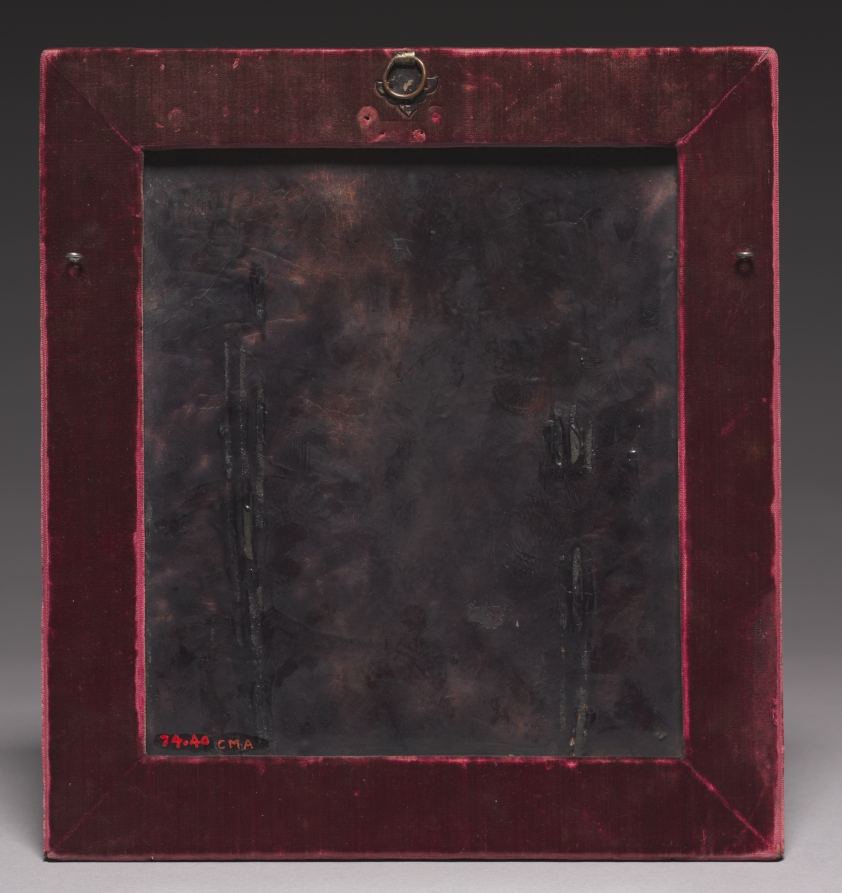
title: Plaque Depicting the Trojan Horse from the Aeneid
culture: France, Limoges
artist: Master of the Aeneid Series (French)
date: c. 1530–40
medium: painted enamel on copper, gilt-silver frame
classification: Enamel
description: This plaque is among the earliest examples of the technique of enamel on copper used during the Renaissance to depict secular scenes. Although it illustrates a passage from the ancient text of the Aeneid, the architecture and dress are more reflective of the courtly style popular in 16th-century France, when this work was made.